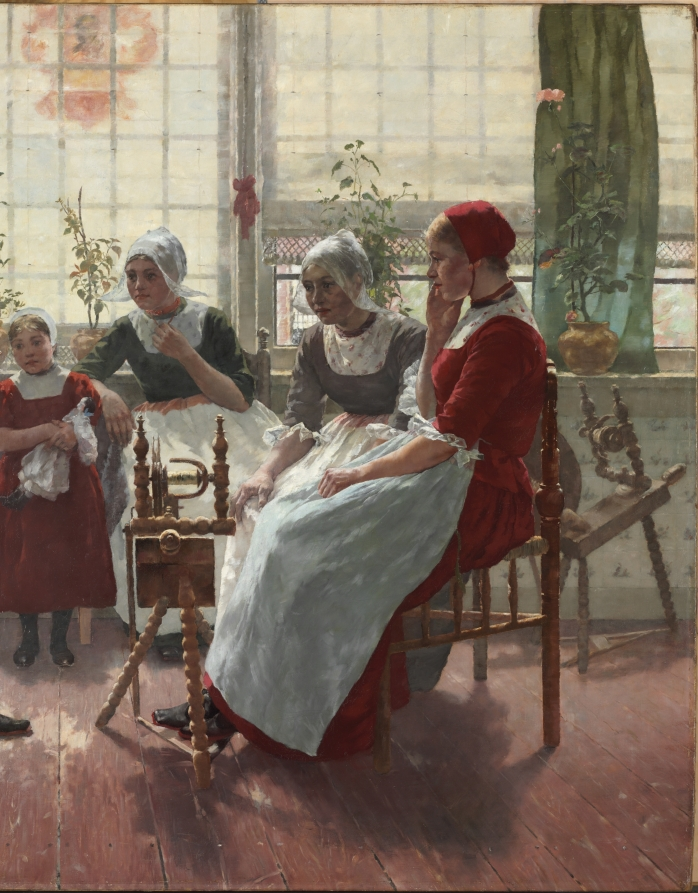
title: The Ghost Story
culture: America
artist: Walter MacEwen (American, 1860–1943)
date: 1887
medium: oil on canvas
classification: Painting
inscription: signed upper left: W. McEWEN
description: During the 1880s, the Netherlands became a magnet for several American artists, among them Walter MacEwen. His most famed painting, The Ghost Story, presents a group of individuals in a Dutch interior listening with rapt attention to spooky narration delivered by a woman at a spinning wheel. A young girl clutches her doll in fascination.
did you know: The women in this painting wear the traditional clothing of Volendam, a fishing village located in the province of North Holland.